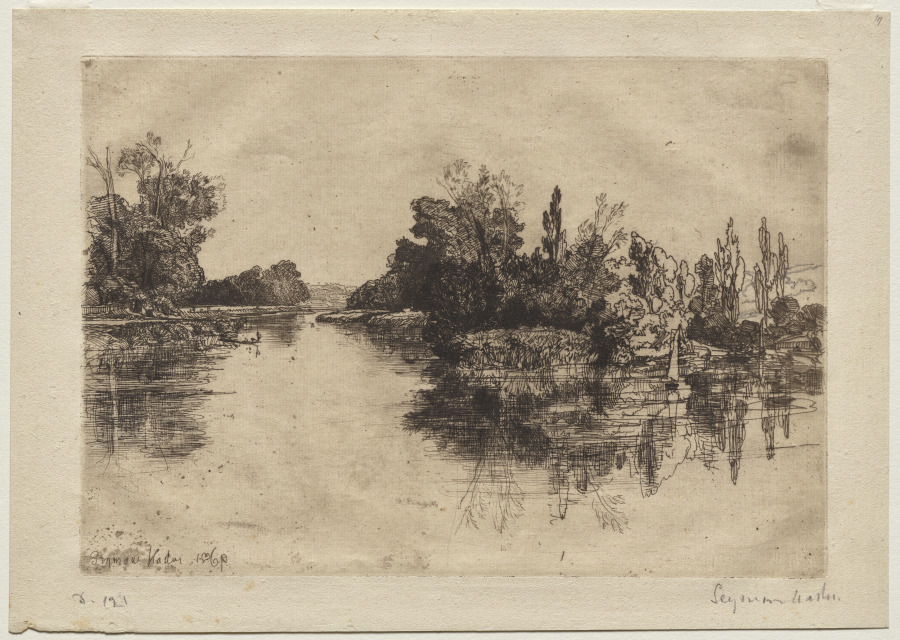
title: The Island, opposite Boyle's Farm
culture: England, 19th century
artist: Francis Seymour Haden (British, 1818–1910)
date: 1869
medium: etching and drypoint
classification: Print